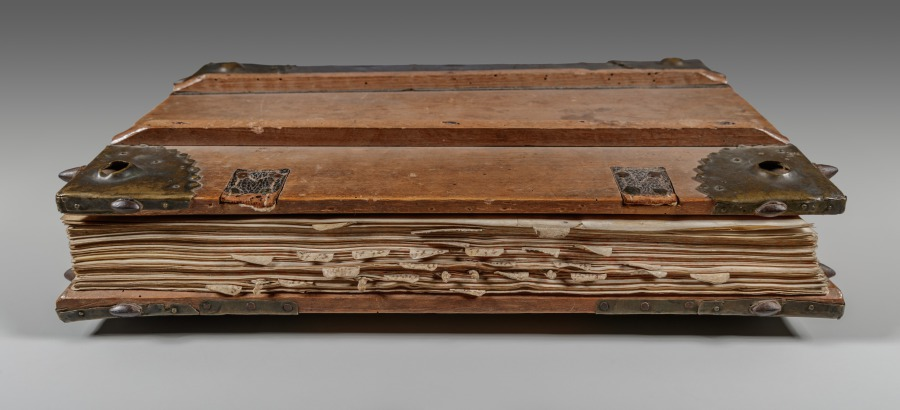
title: Gradual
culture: Italy, Verona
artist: circle of Girolamo dai Libri (Italian, 1474–1555)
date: c. 1520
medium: Ink, tempera, and gold on vellum; wood binding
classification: Manuscript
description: The liturgical book known simply as a “gradual” was the principal choir book used during the Mass. They were produced in multiple volumes, sometimes as many as 12, in order to cover the entire liturgical year. Every church required a set of graduals in addition to other liturgical books such as missals, antiphonaries, and gospel lectionaries. This volume appears to be the lone survivor from a larger set. Its illuminations were painted by an illuminator working in the circle of the much-esteemed and highly imitated painter Girolamo dai Libri of Verona, who was a prolific painter of altarpieces as well as illuminations for books.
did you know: Girolamo dai Libri was only 16 years old when he painted his first altarpiece.